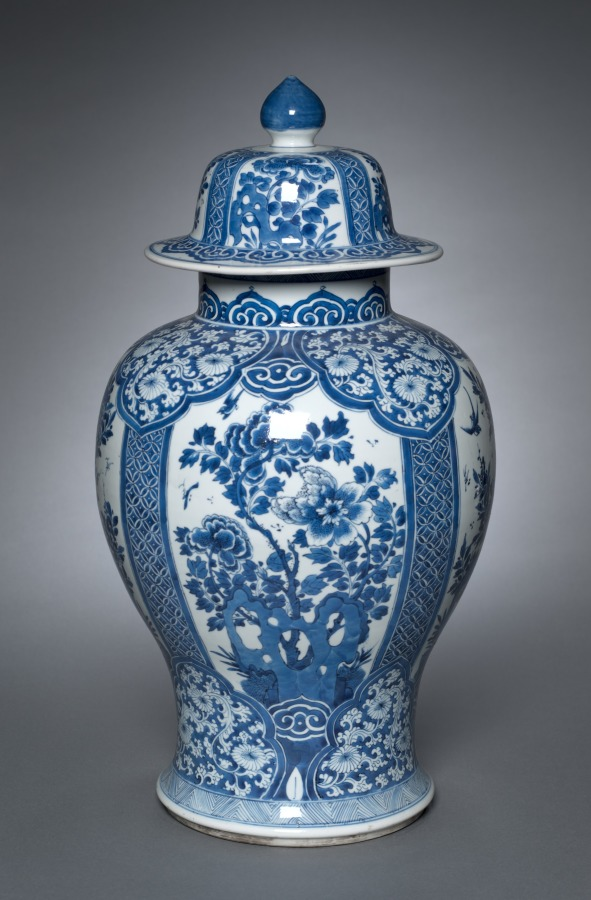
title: Vase with Cover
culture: China, Jiangxi province, Jingdezhen kilns, Qing dynasty (1644–1911), Kangxi reign (1662–1722)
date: 1662–1722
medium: porcelain with underglaze blue decoration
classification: Ceramic